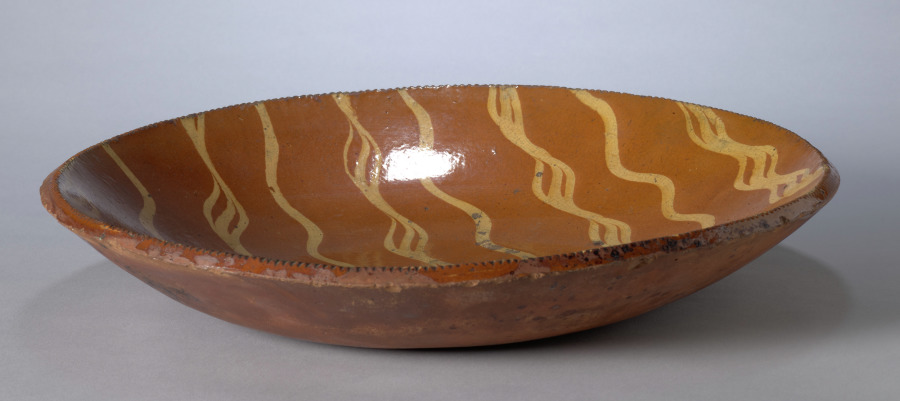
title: Slipware Dish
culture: America, Pennsylvania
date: early 1800s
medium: red terracotta with yellow and transparent glaze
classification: Ceramic